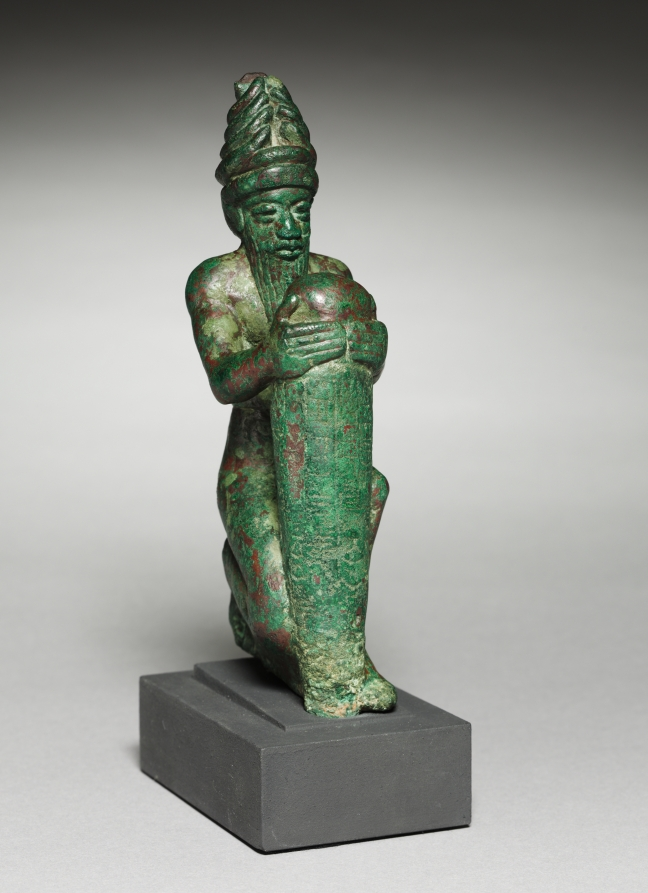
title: "Foundation Nail" of Gudea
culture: Mesopotamia, Neo-Sumerian, Iraq, probably Lagash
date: c. 2100 BCE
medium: copper alloy, lost-wax cast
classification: Sculpture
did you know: The ruler Gudea placed one of these special nails in every temple he built in order to commemorate it.